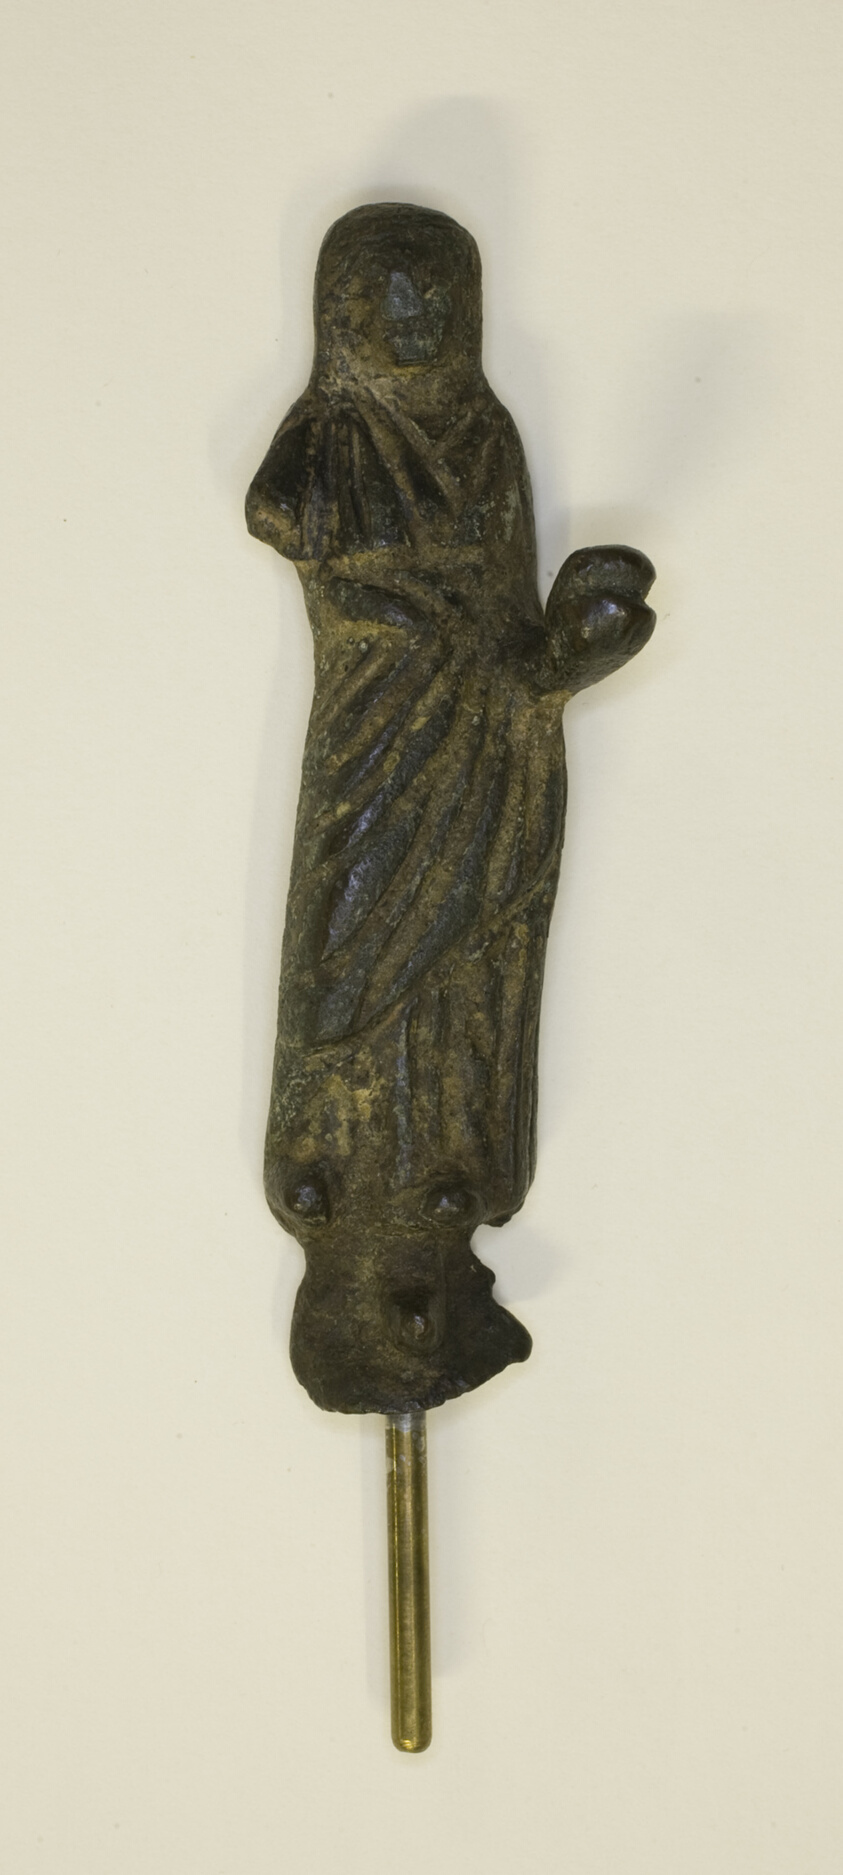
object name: Sculpture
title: Statuette of a Priest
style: etruscan, ancient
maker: Etruscan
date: 3rd century BCE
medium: Bronze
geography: Etruria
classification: statuette; bronze; metal; sculpture; ancient art